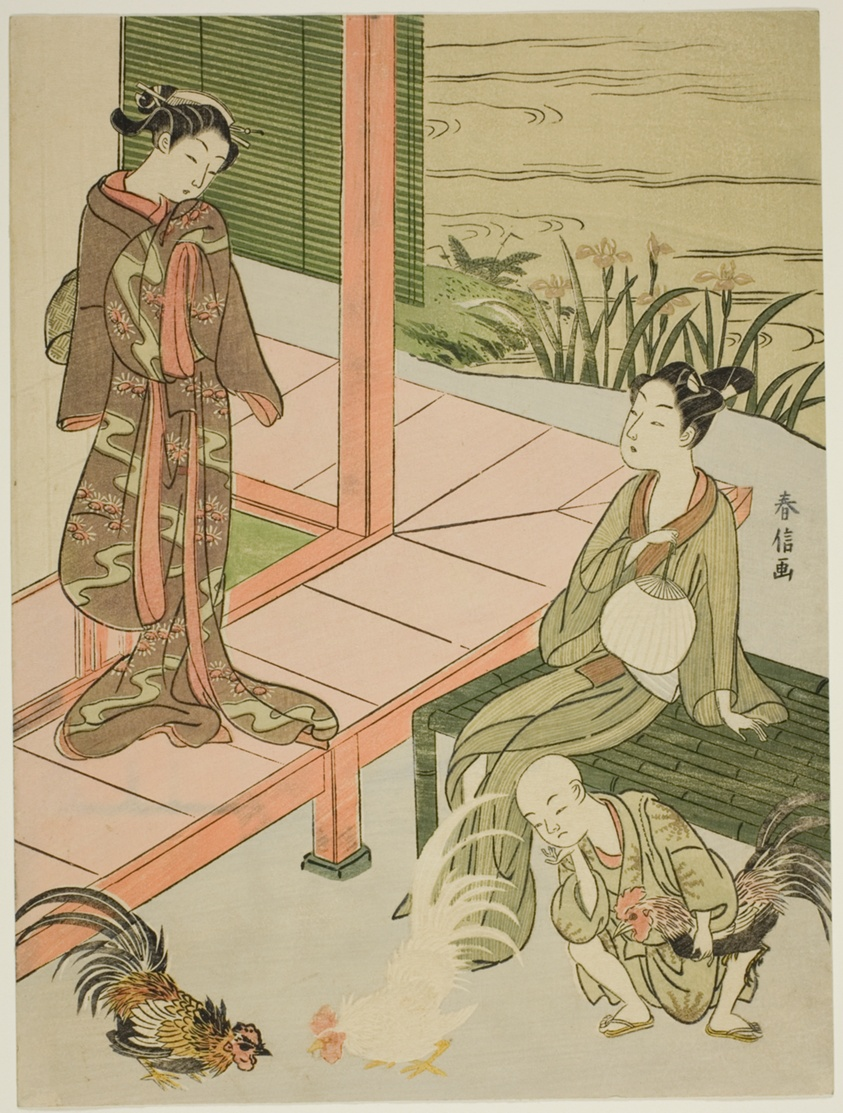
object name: Print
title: Watching a Cockfight at the Edge of the Veranda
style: Japanese (culture or style)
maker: Suzuki Harunobu 鈴木 春信; Japanese, 1725 (?)-1770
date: c. 1767/68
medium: Color woodblock print; chuban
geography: Japan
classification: woodblock print; print; asian art